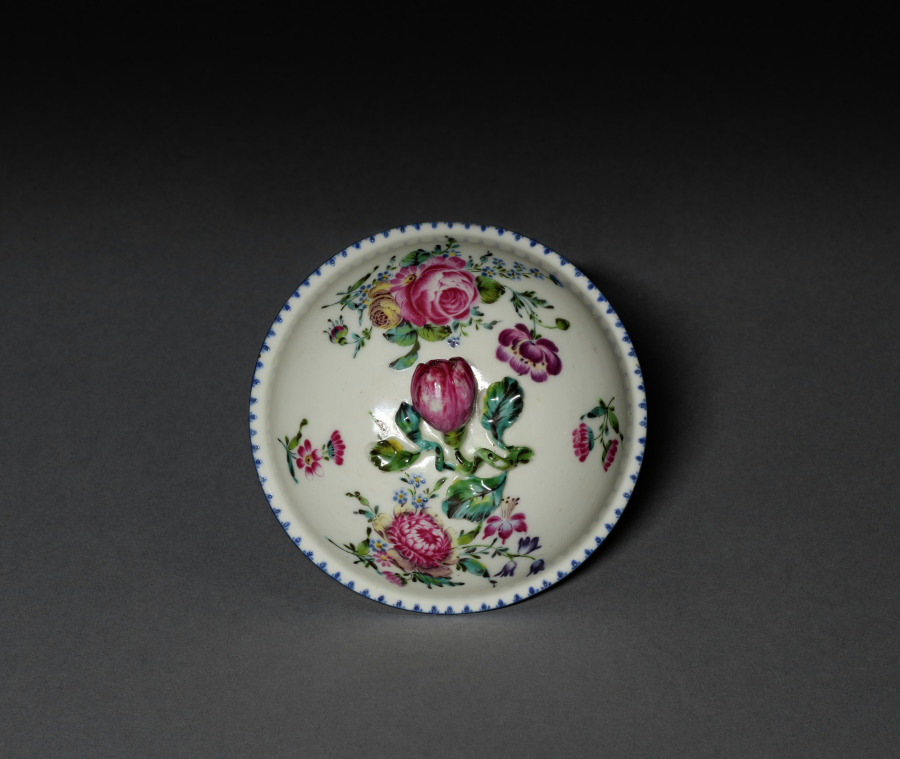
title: Cover for a Broth Bowl (Écuelle ronde)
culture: France, Mennecy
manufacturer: Mennecy- Villeroy Factory (French)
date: c. 1755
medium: soft-paste porcelain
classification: Ceramic